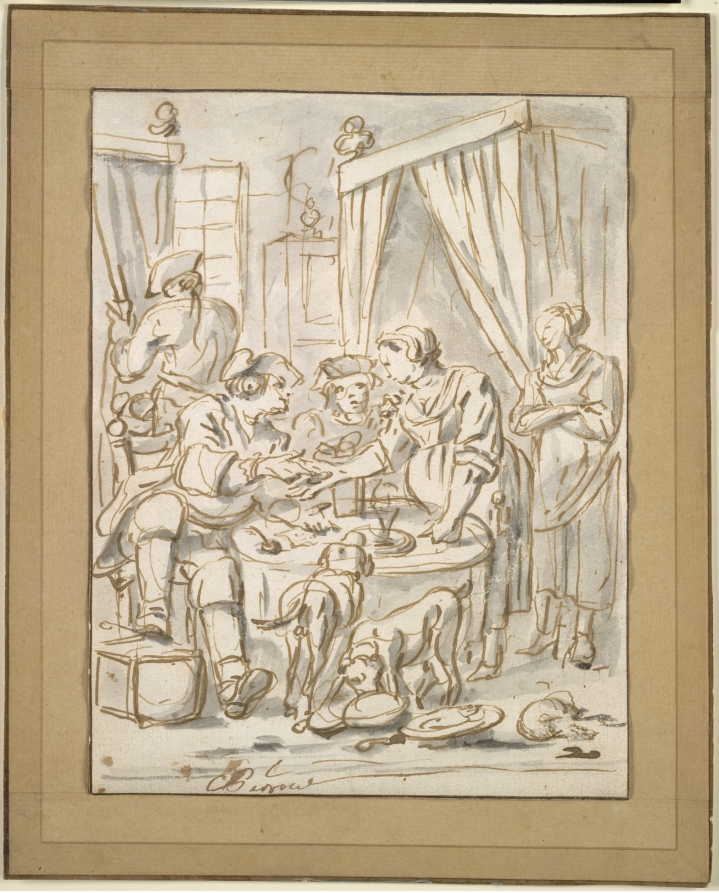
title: Interior Scene with Soldiers at a Table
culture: France, 18th century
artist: Charles Parrocel (French, 1688–1752)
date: c. 1730–1740(?)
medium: pen and brown ink with gray wash on white laid paper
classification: Drawing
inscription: Indeterminable watermark; many watermarks on mount, indeterminable except for "le jour," repeated; signed in brown ink, lower left: C. Parrocel; inscribed on verso of mount in blue ink: J. Parrocel des Batailles/1646/1704 Paris.